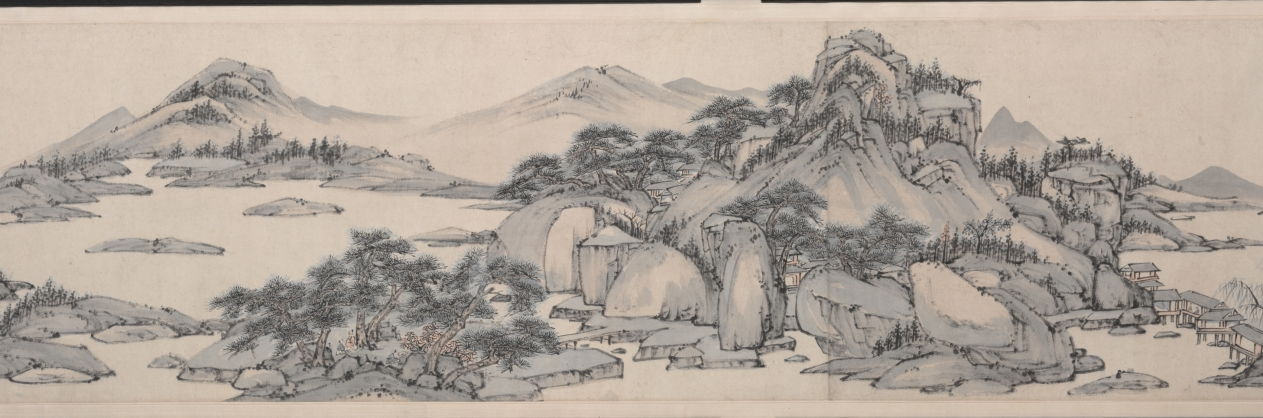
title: Pure Tones among Hills and Waters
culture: China, Qing dynasty (1644-1911)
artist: Xiao Yuncong (Chinese, 1596–1673)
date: 1664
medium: Handscroll; ink and light color on paper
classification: Painting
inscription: 種松發秀色，具是高人心。/ 鑿石築茅屋，長年覆綠陰。/ 白雲無意出，舒卷趨空林。/ 萬籟時一寂，微風墮清音。/ 此情莫可擬，此景誰能論。/ 只向千峰裏，共彈五絃琴。/ 桃花依綠水，不覺又春深。 甲辰花朝題于青蓮閣, 鐘山老人蕭雲從。[印] 鐘山老人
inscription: Title and inscription, dated 1744, and 3 seals of Shen Feng 沈鳳 (1685-1755).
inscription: 4 colophons and 24 additional seals: 1 colophon, dated 1811, and 5 seals of Xiang Yuan 項源 (active about 1811); 1 colophon, dated 1858, and 2 seals of Qi Junzao 祁寯藻 (1793-1866); 1 colophon and 4 seals of Zhang Yunzhong 張允中 (1881–1960?); 4 seals of Jiang Xun 江恂 (active about 1753–after 1780); 1 colophon dated 1943, and 2 seals of Wang Shaoming 汪兆銘 (Wang Jingwei 汪精衛, 1883–1944); 1 seal of Qi Zhiliu 祁之鏐 (active about 1858); 2 seals of Yu Zhimeng 俞芷盟 (second half of 19th century); 4 seals unidentified.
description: Painted at age 68, this landscape is one of Xiao Yuncong’s most mature works. Extraordinary in its combination of fine details with bold brushstrokes and bluish washes, it is also one of his longest compositions in handscroll format, extending over 23 feet. Throughout his lifetime, Xiao visited Nanjing and Yangzhou, where he met with other painters and literati. Regarded as the founder of the Gushu school (姑孰派) of painting, Xiao painted from nature, and his landscapes are informed by his travels, as well as by his experience as a print designer.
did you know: Biographical notes on Xiao Yuncong relate that he did not pursue the career of an official, but "furnished a cottage in the eastern suburbs [of Wuhu in Anhui province] and amused himself playing the qin (zither) and reading every day."